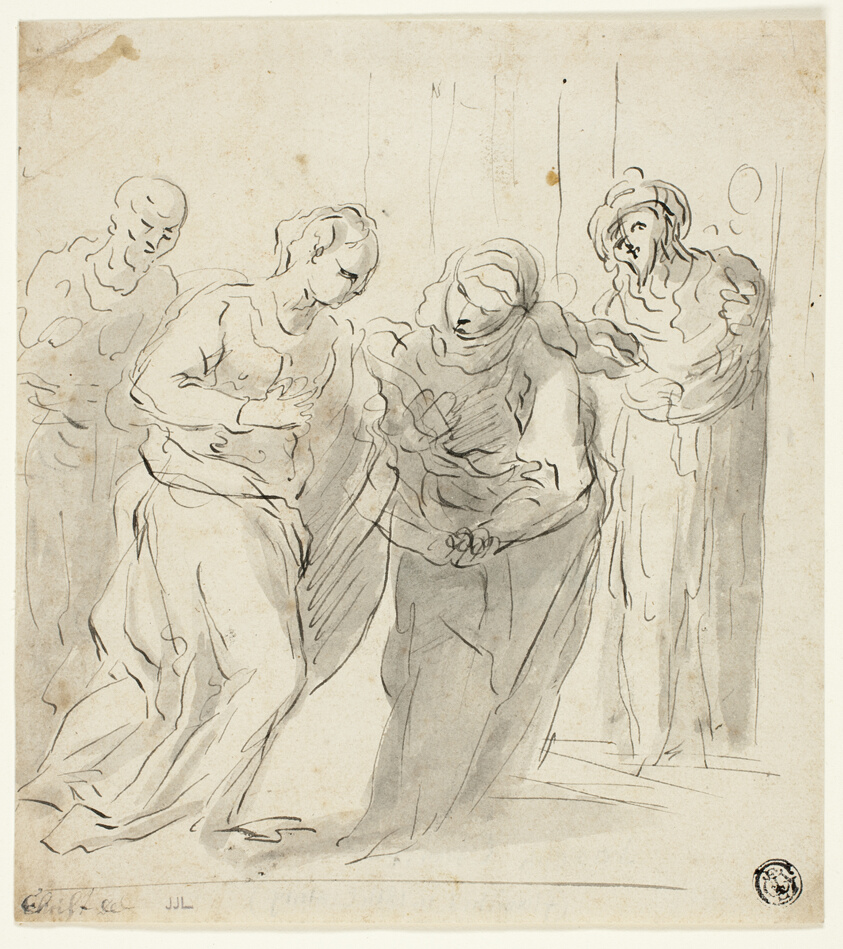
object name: Drawing and Watercolor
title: Visitation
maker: Unknown artist; German, 18th century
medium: Pen and black ink with brush and gray wash, over traces of graphite, on ivory laid paper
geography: Germany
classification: pen and ink drawings; drawings (visual works); prints and drawing